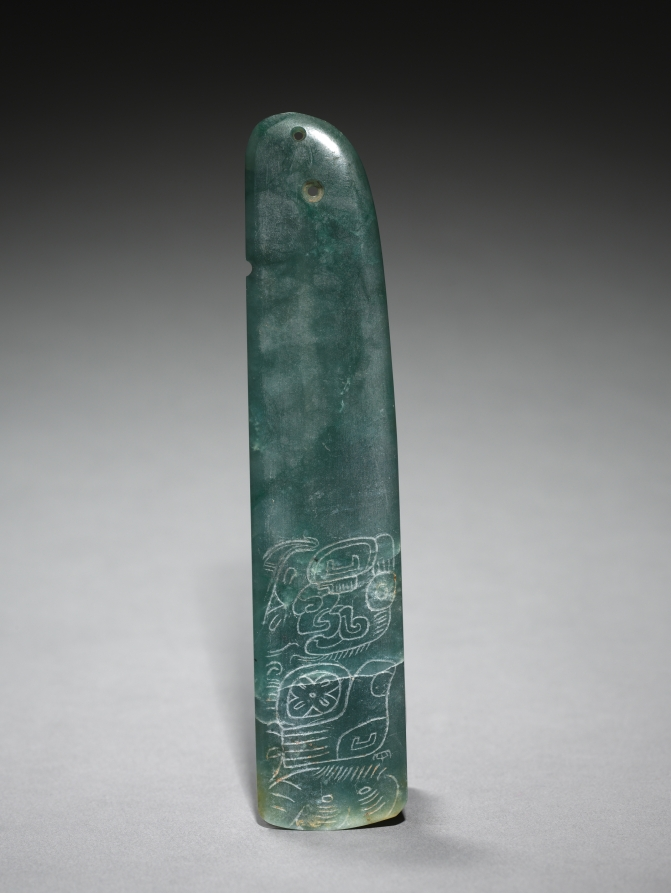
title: Ornament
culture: Mexico or Central America, Maya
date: 250–550 CE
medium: jadeite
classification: Jade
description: Greenstone ornaments were part of Maya nobles' regalia. This comes from an ornament that was cut in half in antiquity. The original, twice as wide, probably hung from an elaborate belt, crucial to royal costume.